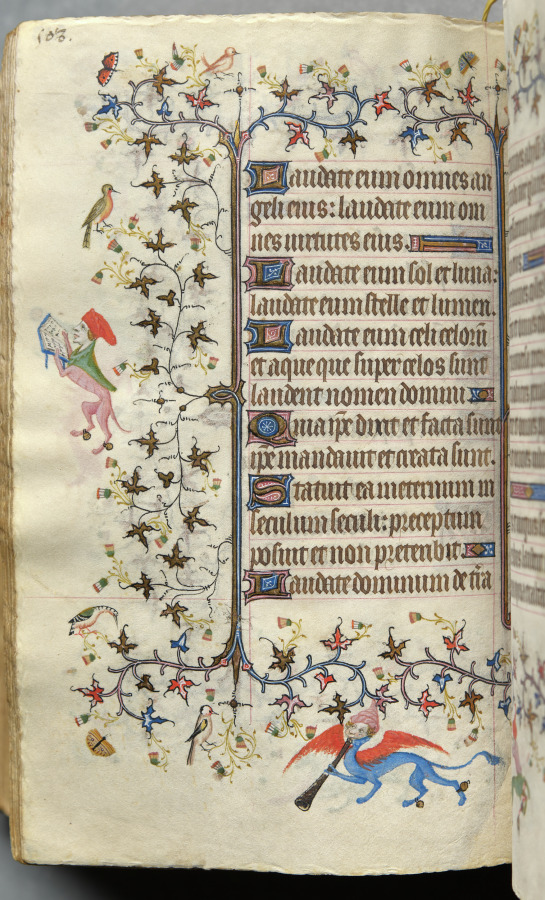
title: Hours of Charles the Noble, King of Navarre (1361-1425): fol. 248v, Text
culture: France, Paris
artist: Master of the Brussels Initials and Associates (French)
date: c. 1405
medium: ink, tempera, and gold on vellum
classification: Bound Volume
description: This precious volume was obviously highly prized by its owner, the French-born King of Navarre, who had his coat of arms painted on no less than twenty folios. Rather than directly commissioning this manuscript from a specific workshop, it seems that Charles the Noble acquired his book of hours -- perhaps ready-made for the luxury market -- while on a trip to Paris in 1404-05. A collaborative effort, six painting styles are evidenced within the pages of this codex, those of two Italians, two Frenchmen, and two Netherlanders. The painter who was responsible for the planning and decoration of the book, and who produced seventeen of the large miniatures, was a Bolognese artist known as the Master of the Brussels Initials. His principal assistant, responsible for most of the borders, was a Florentine who signed his name "Zecho" da Firenze on folio 208 verso.